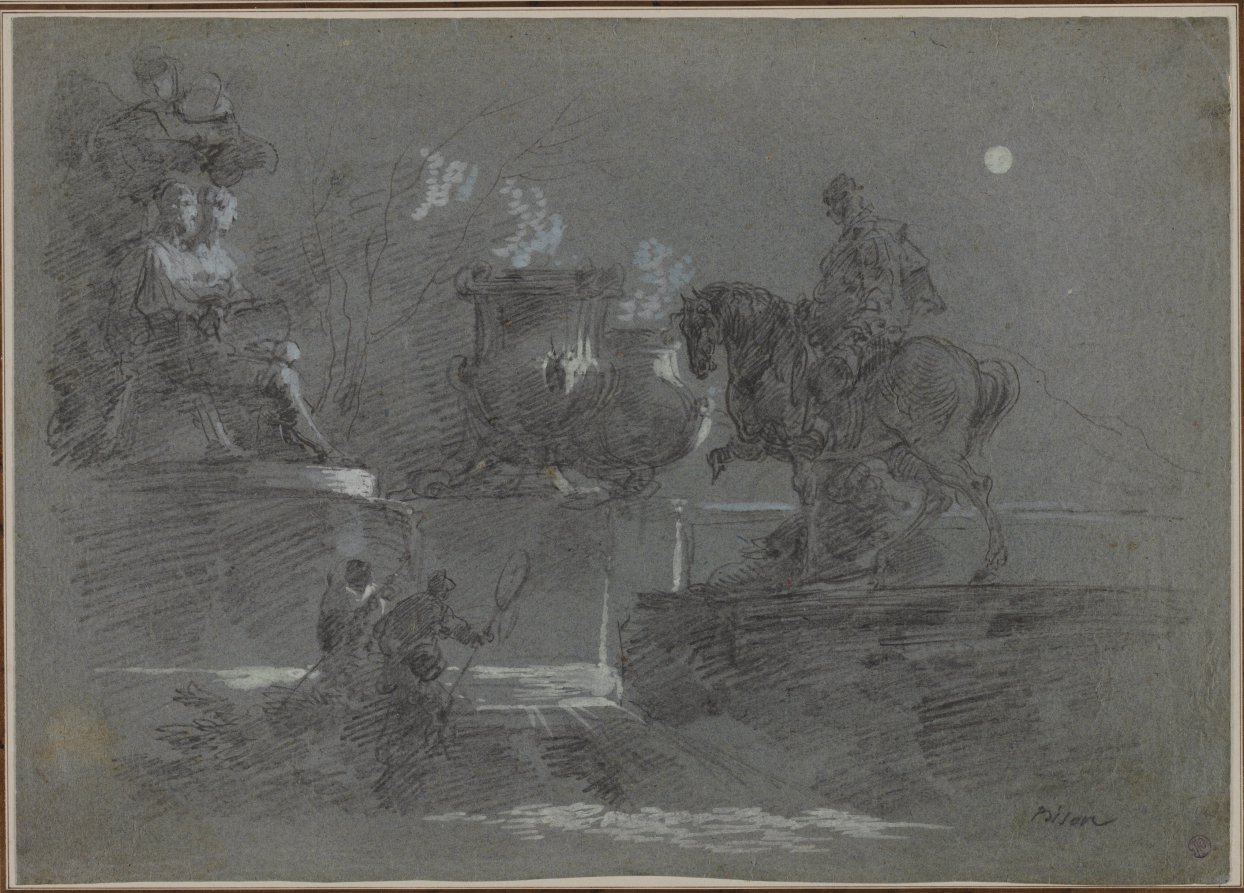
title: Monumental Sculpture in a Moonlit Park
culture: Italy, 19th century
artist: Giuseppe Bernardino Bison (Italian, 1762–1844)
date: c. 1842?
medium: black chalk with blue gouache, heightened with white gouache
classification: Drawing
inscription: signed, lower right, in black chalk: Bison ; VERSO, center right, in graphite: [P?]INK / F/M L/W